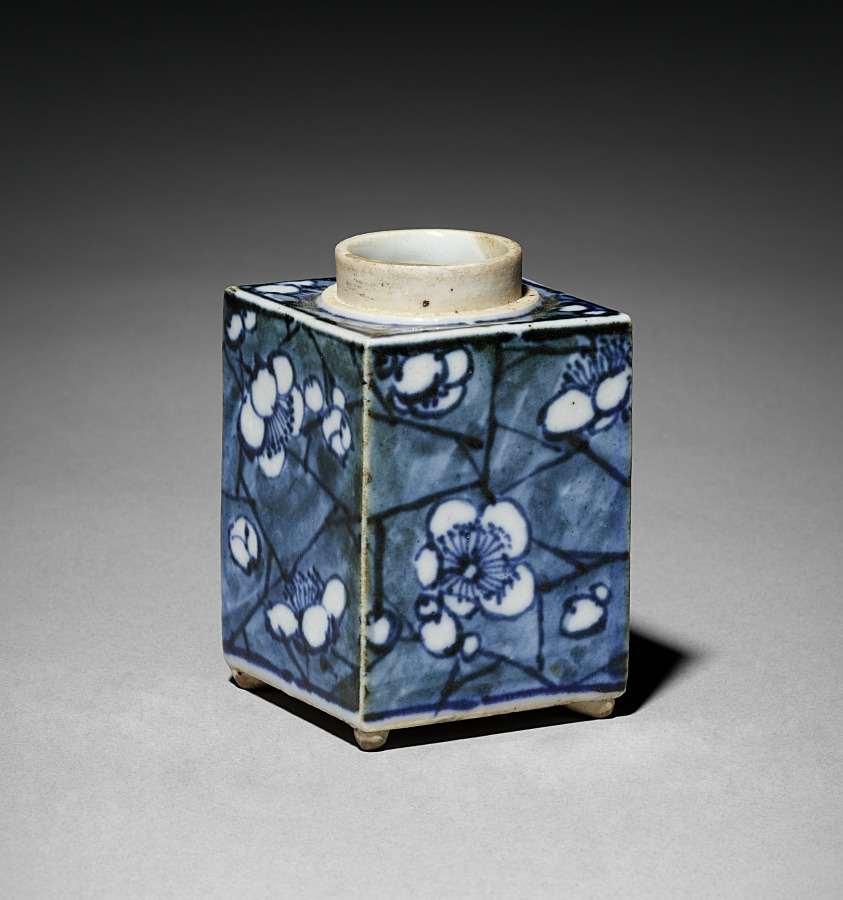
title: Tea Container with Plum Blossoms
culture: Japan, Edo period (1615–1868)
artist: Aoki Mokubei (Japanese, 1767–1833)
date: early 1800s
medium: porcelain with underglaze blue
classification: Ceramic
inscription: signed "Ro Mokubei" on base in underglaze blue.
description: Aoki Mokubei, born into a family of restaurateurs, was a potter, calligrapher, painter, and scholar, and is considered one of the three masters of later Edo period Kyoto ceramics. He specialized in porcelains fashioned after Chinese prototypes, and created works for steeped tea (sencha) such as these matching tea caddies decorated in an underglaze blue called sometsuke—literally “with applied dye.” He signed them on their bottoms. They also have intricately patterned silk sleeves to both beautify and protect them. On the exterior of the lid of the outer wooden box that contains them, it is written that Mokubei inscribed and painted an image on the box. On the interior of the lid, the signature and seals of a former owner are written. Mokubei has signed the lid of the inner box, and a charming ink and light color composition of West Lake in Hangzhou in China covers its three sides. On the fourth side is a long inscription by Mokubei describing the scene.